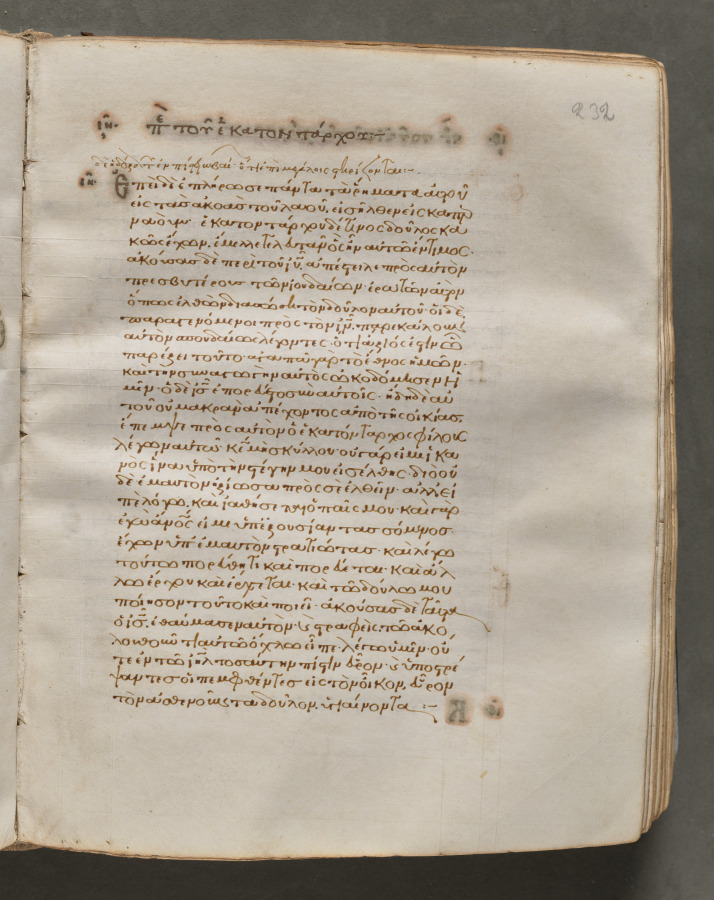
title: Text, folio 232 (recto), from a Gospel Book with Commentaries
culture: Byzantium, Constantinople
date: c. 1000–1100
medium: ink, tempera, and gold on vellum; leather binding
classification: Bound Volume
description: Each of the four gospels in this book opens on a page with brilliantly illuminated borders depicting the author of the text as well as birds—principally peacocks, symbols of the immortality of the soul—and fountains, representing the fountain of life and the salvation of the soul. This volume consists of 428 leaves with texts in Greek. Its level of sophistication suggests that it was probably written and decorated in a monastery in Constantinople.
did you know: Gospel books were carried in procession through Byzantine churches.